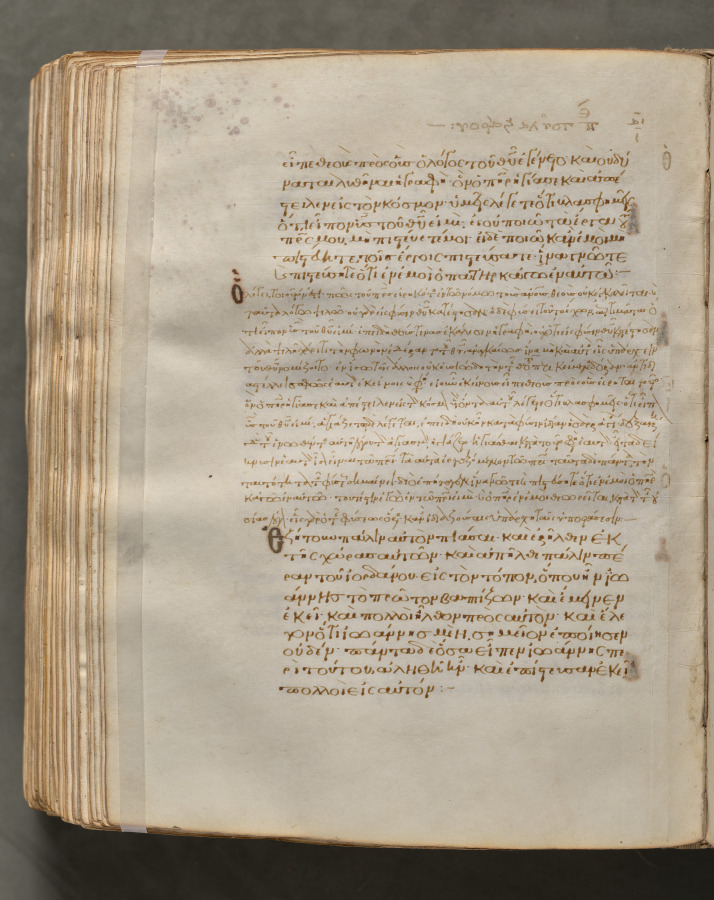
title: Text, folio 375 (verso), from a Gospel Book with Commentaries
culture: Byzantium, Constantinople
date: c. 1000–1100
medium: ink, tempera, and gold on vellum; leather binding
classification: Bound Volume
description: Each of the four gospels in this book opens on a page with brilliantly illuminated borders depicting the author of the text as well as birds—principally peacocks, symbols of the immortality of the soul—and fountains, representing the fountain of life and the salvation of the soul. This volume consists of 428 leaves with texts in Greek. Its level of sophistication suggests that it was probably written and decorated in a monastery in Constantinople.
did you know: Gospel books were carried in procession through Byzantine churches.